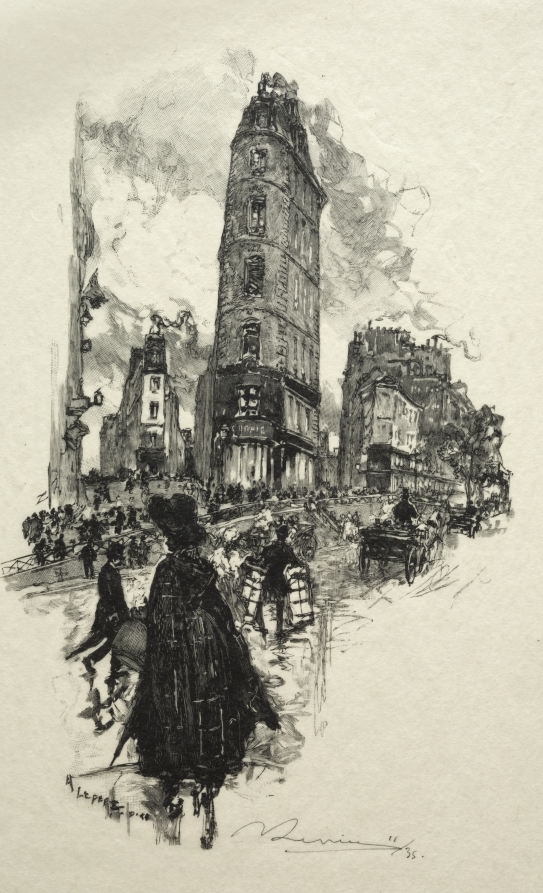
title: Coin de la Rue de la Lune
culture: France, 19th century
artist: Auguste Louis Lepère (French, 1849–1918)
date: 1890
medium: wood engraving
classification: Print